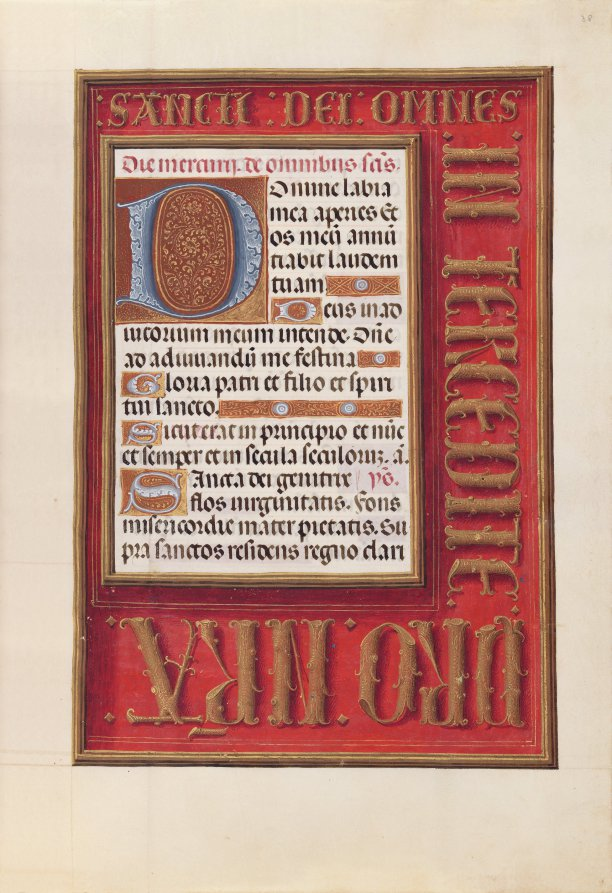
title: Hours of Queen Isabella the Catholic, Queen of Spain: Fol. 38r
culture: Flanders, Ghent and Bruges, late 15th century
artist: Master of the First Prayerbook of Maximillian (Flemish, c. 1444–1519)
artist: and Associates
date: c. 1500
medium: ink, tempera, and gold on vellum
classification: Bound Volume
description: This manuscript was illuminated by a circle of at least five highly organized manuscript painters active in the Flemish cities of Ghent and Bruges. The principal illuminator was Alexander Bening, who painted the majority of the book's miniatures. Manuscripts produced by this circle of artists are renowned for the decoration of their borders, which typically feature a rich variety of realistically-painted flowers, birds, and butterflies. This prayer book, called a book of hours, was intended not for a cleric, but for the private devotions of a lay person-in this case, Isabella the Catholic, Queen of Spain (1451-1504). Isabella's coat of arms embellishes the book's frontispiece. It is unlikely that the book was commissioned by the Queen herself; rather, she probably received it as a diplomatic gift from someone courting her patronage, perhaps Cardinal Francisco Jimenez de Cisneros. A Franciscan friar, Jimenez was dependent upon Isabella for his advancement, first to the post of Queen's confessor in 1492, and then to Archbishop of Toledo in 1495.